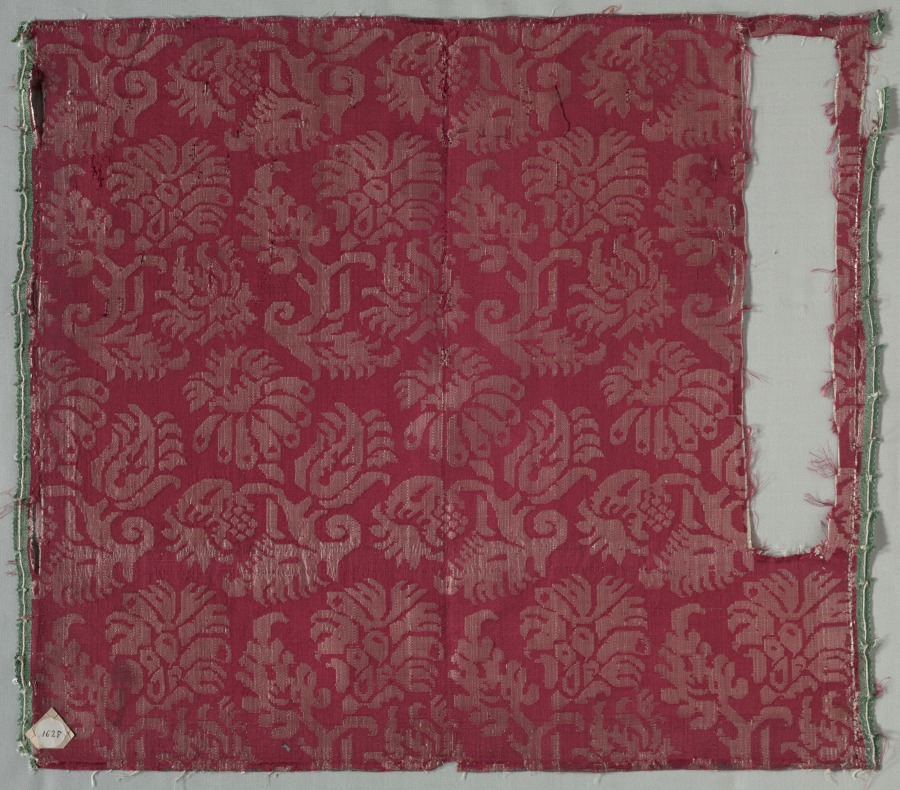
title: Two Lengths of Silk Damask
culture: Italy, 17th century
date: 1600s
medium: damask, silk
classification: Textile